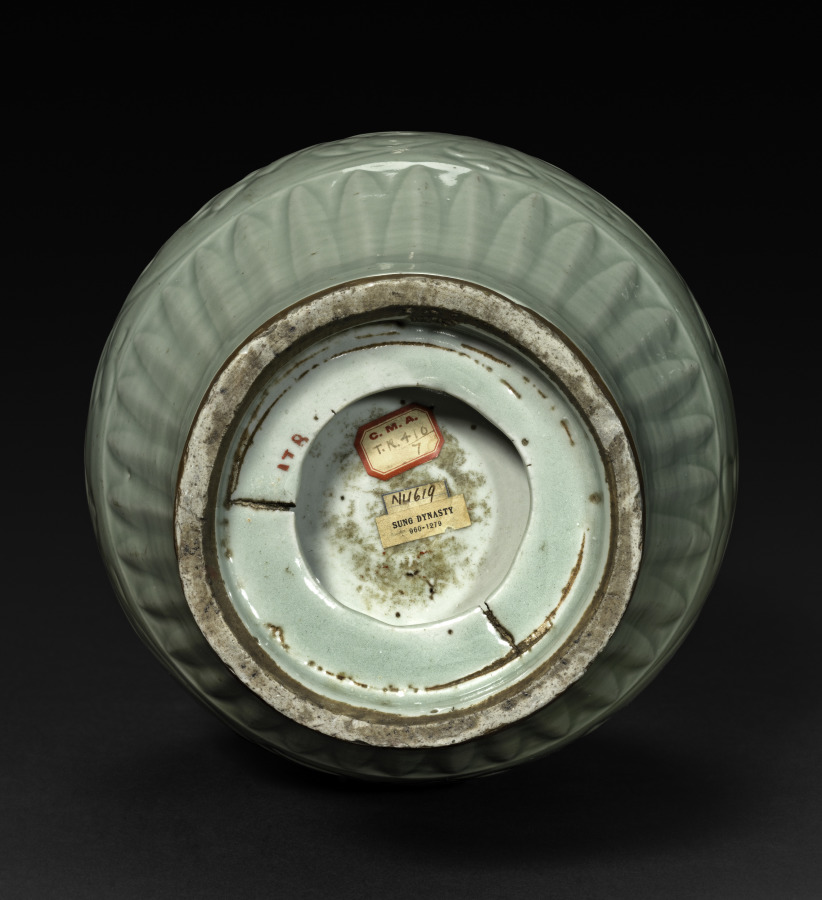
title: Vase: Celadon Ware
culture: China, Ming dynasty (1368–1644)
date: 1368–1644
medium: stoneware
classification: Ceramic